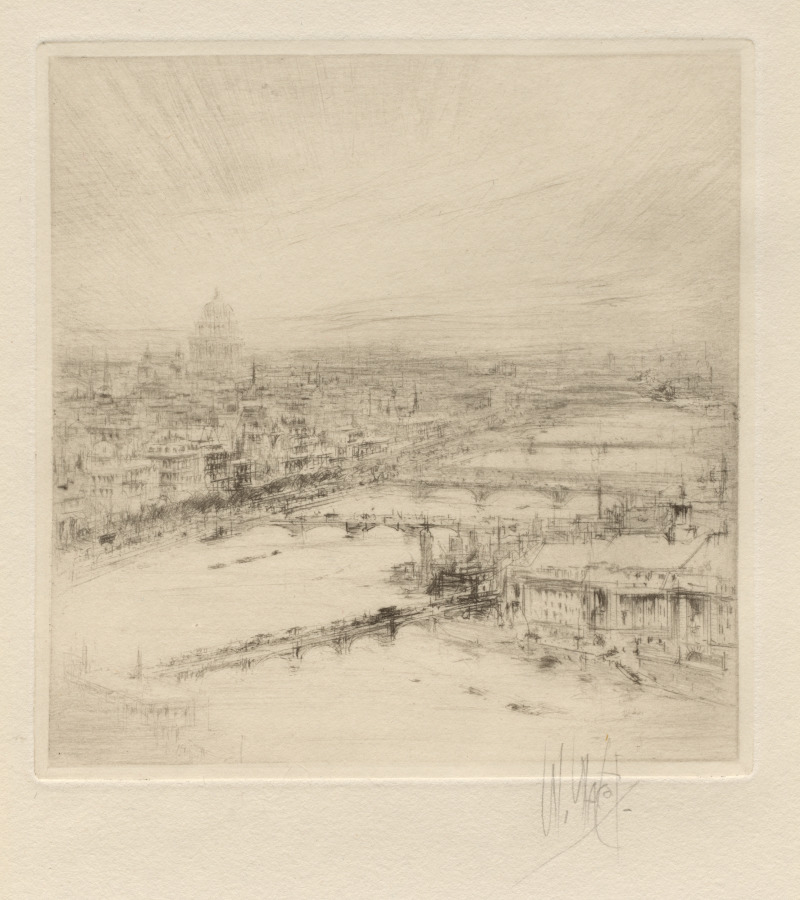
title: London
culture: England, 20th century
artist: William Walcot (British, 1874–1943)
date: 1920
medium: etching in brown, and drypoint, plate tone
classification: Print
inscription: Lower right, in graphite: W. Walcott